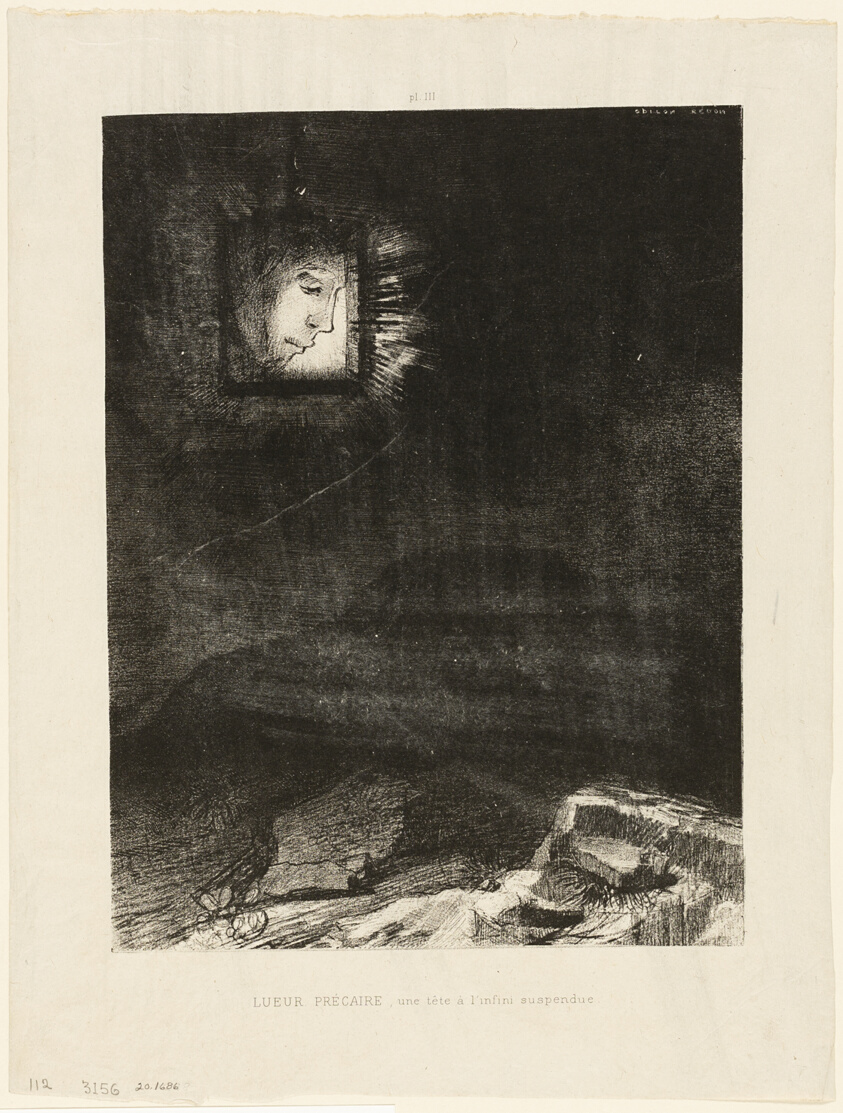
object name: Print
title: Precarious Glimmering, a Head Suspended from Infinity, plate 3 of 6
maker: Odilon Redon (French, 1840-1916)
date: 1891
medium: Lithograph on light gray chine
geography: France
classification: lithograph; print; prints and drawing; paper